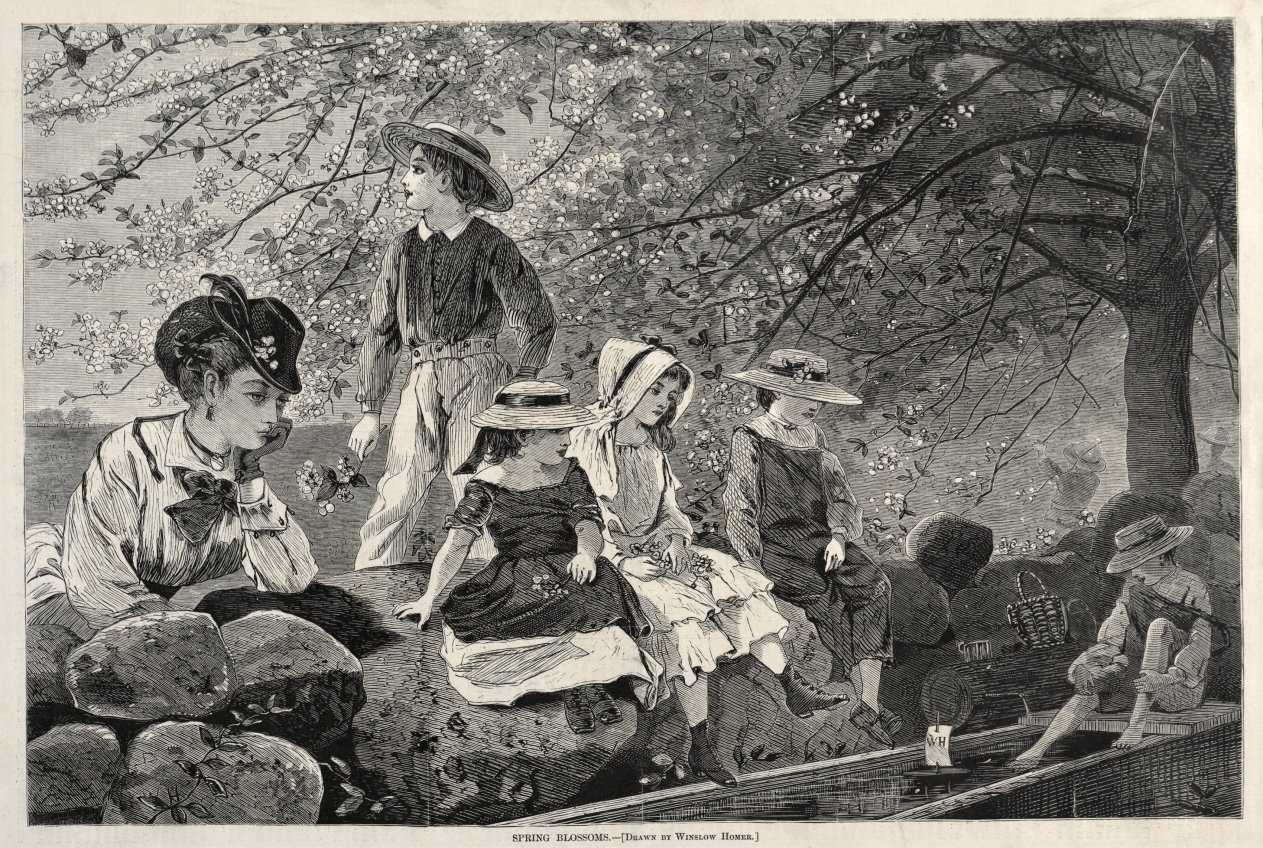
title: Spring Blossoms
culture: America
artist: Winslow Homer (American, 1836–1910)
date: 1870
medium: wood engraving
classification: Print